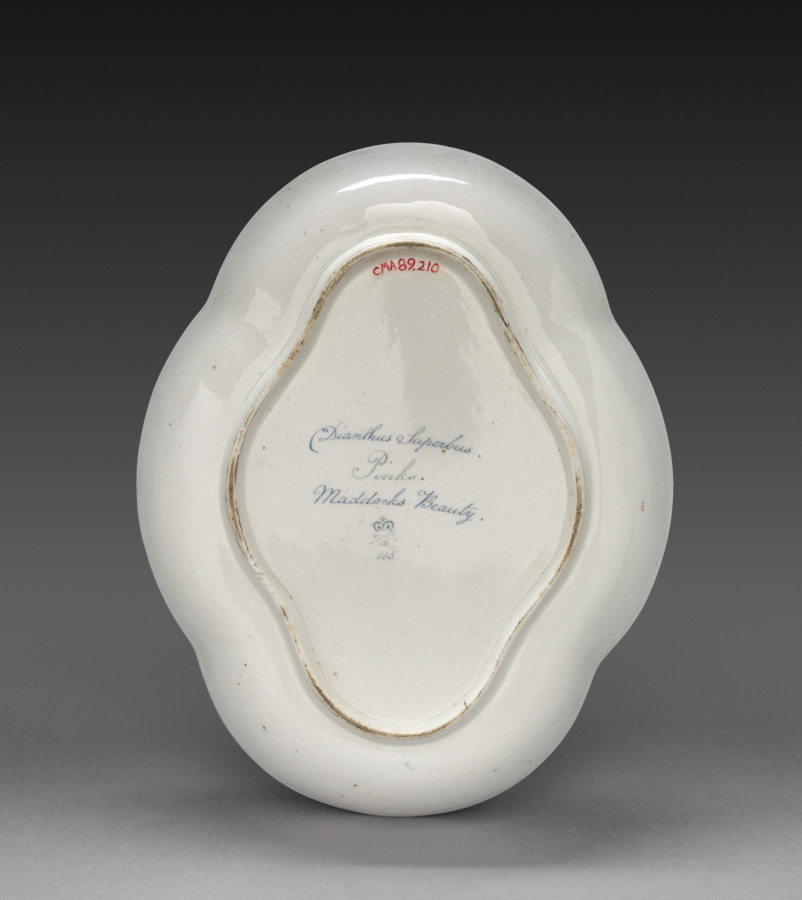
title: Quatrelobed Dish from Dessert Service: Pinks--Maddocks Beauty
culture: England, Derby, 18th century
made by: Derby (Crown Derby Period) (British)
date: c. 1800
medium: porcelain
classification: Ceramic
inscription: inscribed in blue on back: Dianthus Superbus./Pinks./Maddocks Beauty./crown/crossed batons and dots/D/115.